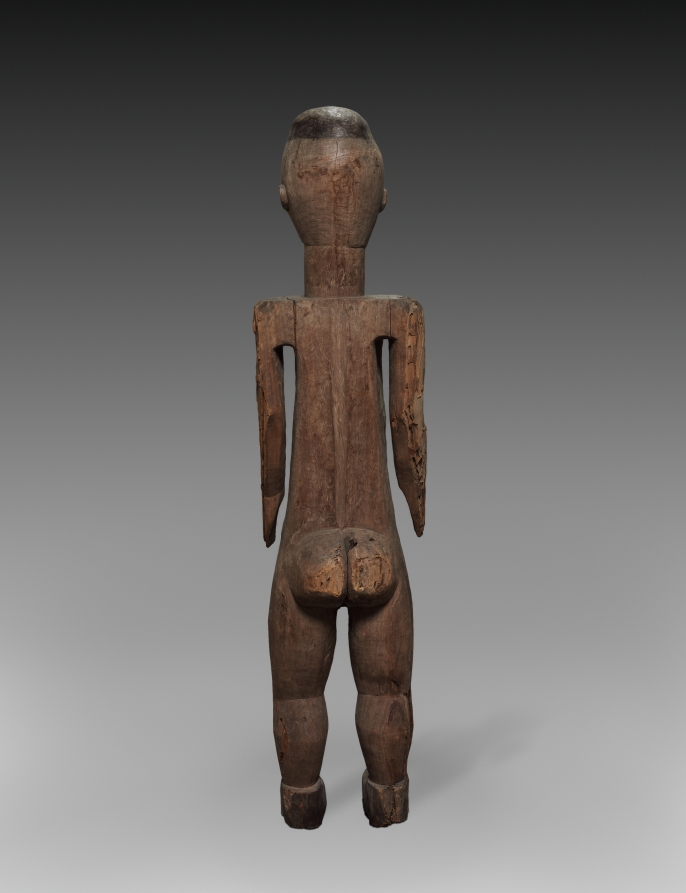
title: Figure of a Pair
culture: Africa, Central Africa, Democratic Republic of the Congo or Central African Republic (most likely), possibly Monzombo-style maker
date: late 1800s–early 1900s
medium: Wood and iron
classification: Sculpture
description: The Ubangi region's history of successive migrations and assimilations has resulted in numerous exchanges of religious beliefs and ritual practices. Despite some stylistic traits, including the heart-shaped faces and the male's crested coiffure, this figure with its female pair is unlike any other in the Ubangian corpus. Based on indirect evidence, the pair is said to represent the culture's primordial couple.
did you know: This pair is of a male and female and is said to represent the culture's primordial couple. There are no other carved mother-child figures that originate from the Monzombo ethnic group.